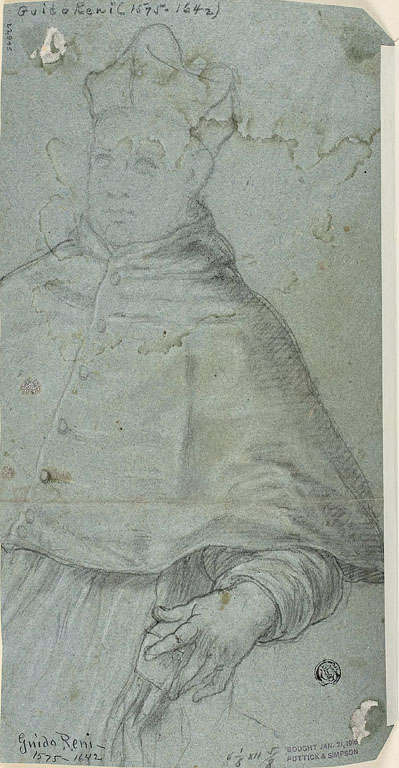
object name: Drawing and Watercolor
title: Musician Angels in Clouds (recto); Seated Cleric (verso)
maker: Possibly Guido Reni; Italian, 1575-1642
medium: Black chalk, heightened with traces of white chalk (recto and verso), on blue laid paper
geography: Italy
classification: chalk; drawings (visual works); prints and drawing